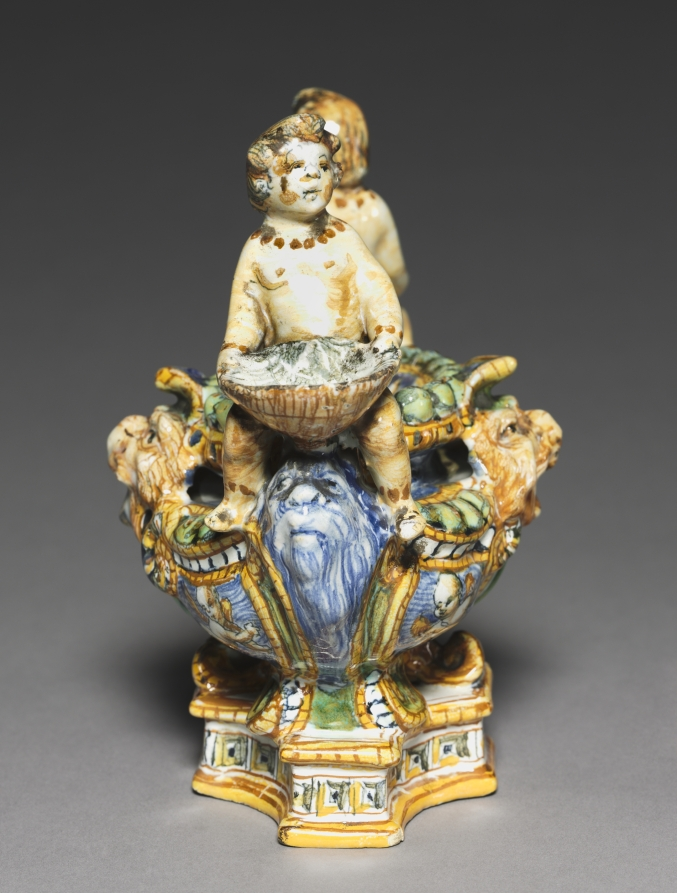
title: Saltcellar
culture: Italy, Urbino, 16th century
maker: circle of the Patanazzi Family (Italian)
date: c. 1570–90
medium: tin-glazed earthenware (maiolica)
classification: Ceramic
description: During the Italian Renaissance of the 1400s and 1500s, nobles and merchants eager to express their wealth and sophistication ordered ceramics for dining, display, and storage. Known as maiolica, because it resembled the brightly colored ceramics from the Mediterranean island of Majorca, these ceramic vessels were covered with a tin glaze that provided an opaque white surface on which colorful decoration could be painted.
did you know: During the Renaissance, salt was an expensive commodity and was used to both season and preserve food.